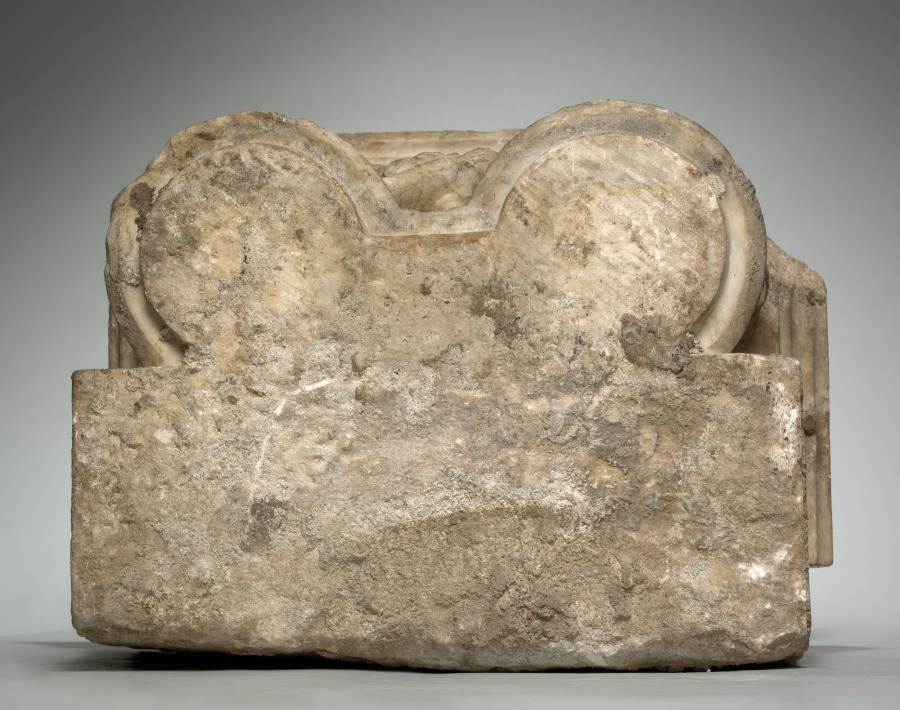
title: Engaged Capital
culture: Southern France, Abbey of Larreule, near Tarbes, 15th century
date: 1400s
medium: limestone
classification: Sculpture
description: This capital belongs to a surviving group including other architectural fragments that once decorated the cloister of the Abbey of Larreule. A cloister was a covered walkway or arcade, usually around all four sides of a square area of grass (the "cloister garth"). The seclusion of the cloister was the monks’ exclusive domain, off limits to others. Here, the monks were supposed to pray, study, meditate, and exercise in privacy and solitude. Such cloister capitals served both to instruct the monks and as a focus for their devotions. Other capitals in this series are installed in the Jardin Massey at Tarbes, near the original abbey. An arch from Larreule has been assembled with other associated French capitals at The Cloisters in New York.